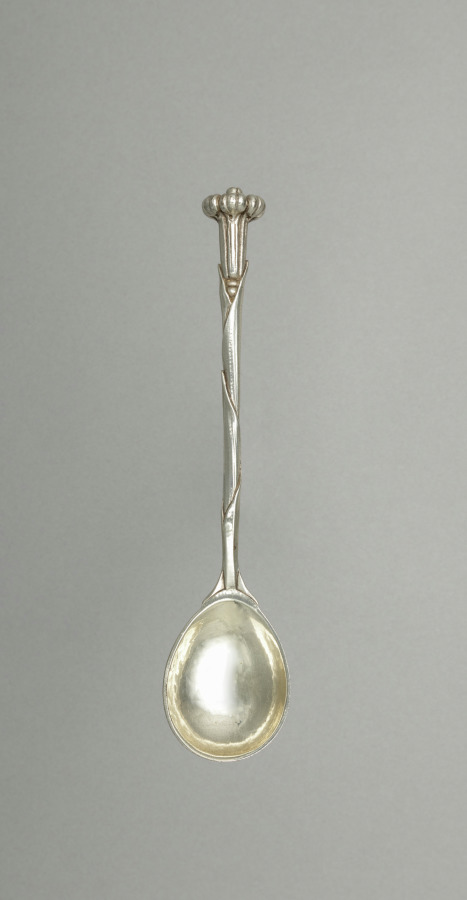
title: Caviar Spoon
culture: England, 20th century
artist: Omar Ramsden (British, 1873–1939)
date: 1930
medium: silver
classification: Silver